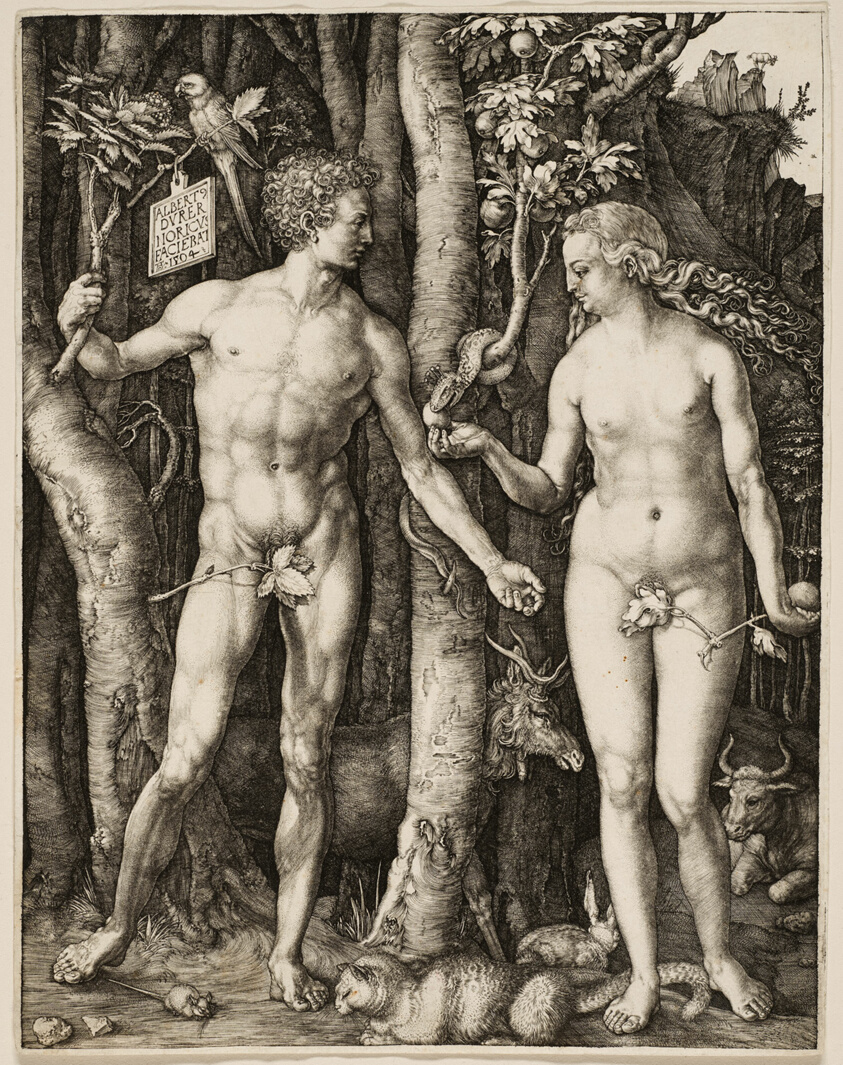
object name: Print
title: Adam and Eve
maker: Albrecht Dürer (German, 1471-1528)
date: 1504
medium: Engraving in black on ivory laid paper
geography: Germany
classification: engraving; print; prints and drawing; paper